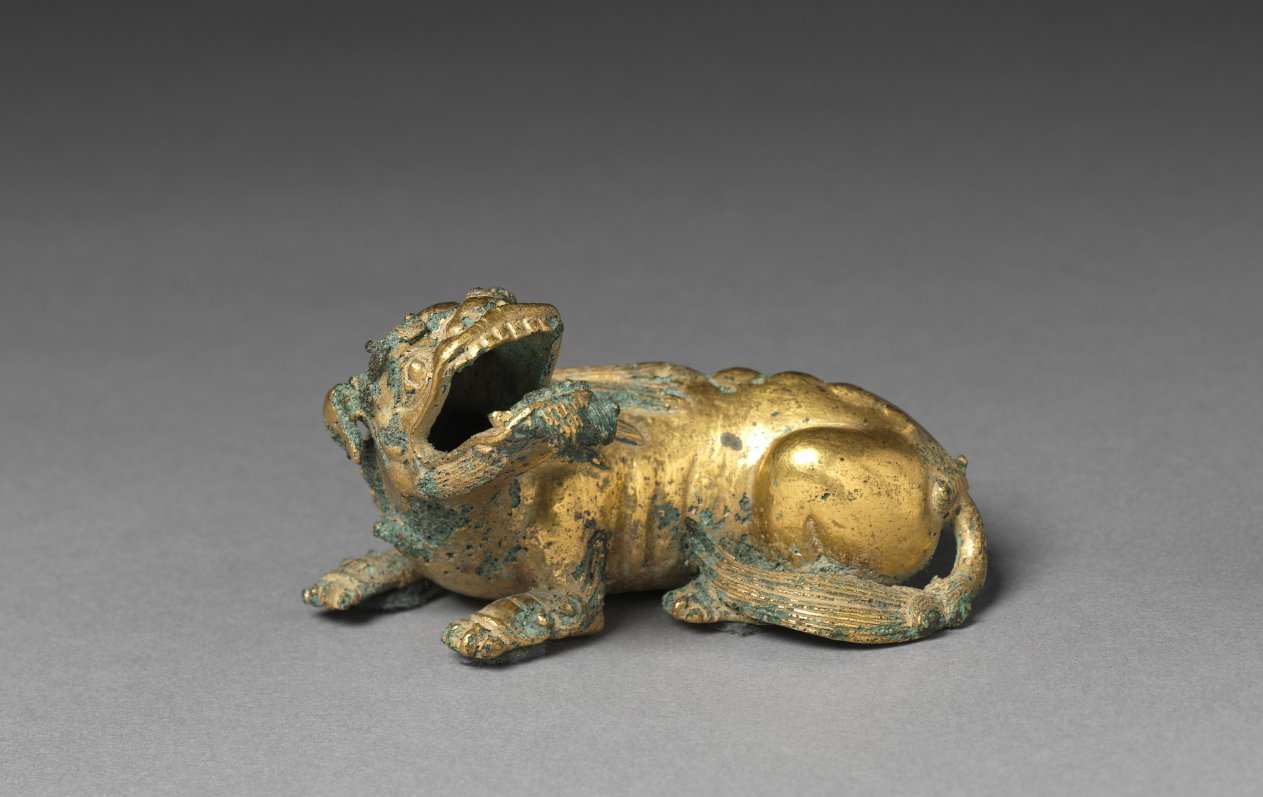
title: Dog-shaped Paperweight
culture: Korea, Unified Silla period (676-935)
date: 676–935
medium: gilt bronze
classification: Sculpture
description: This small object in the shape of a hybrid dog-lion is believed to have been used as a paperweight. Since the Three Kingdoms period (57 BC−668), mercury amalgam gilding had been widely employed to embellish metal objects as well as to make their surface resistant to acids. This technique involves mixing pure gold powder with liquid mercury to form a paste-like mixture. As heat is applied, the mercury evaporates, but an opaque layer of gold remains on the surface. This coating must be polished by first rubbing it with dried rice seedlings, then processing it in ash lye to eliminate impurities; next, the piece is washed and rinsed in a plum vinegar bath.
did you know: This is a dog and lion hybrid.